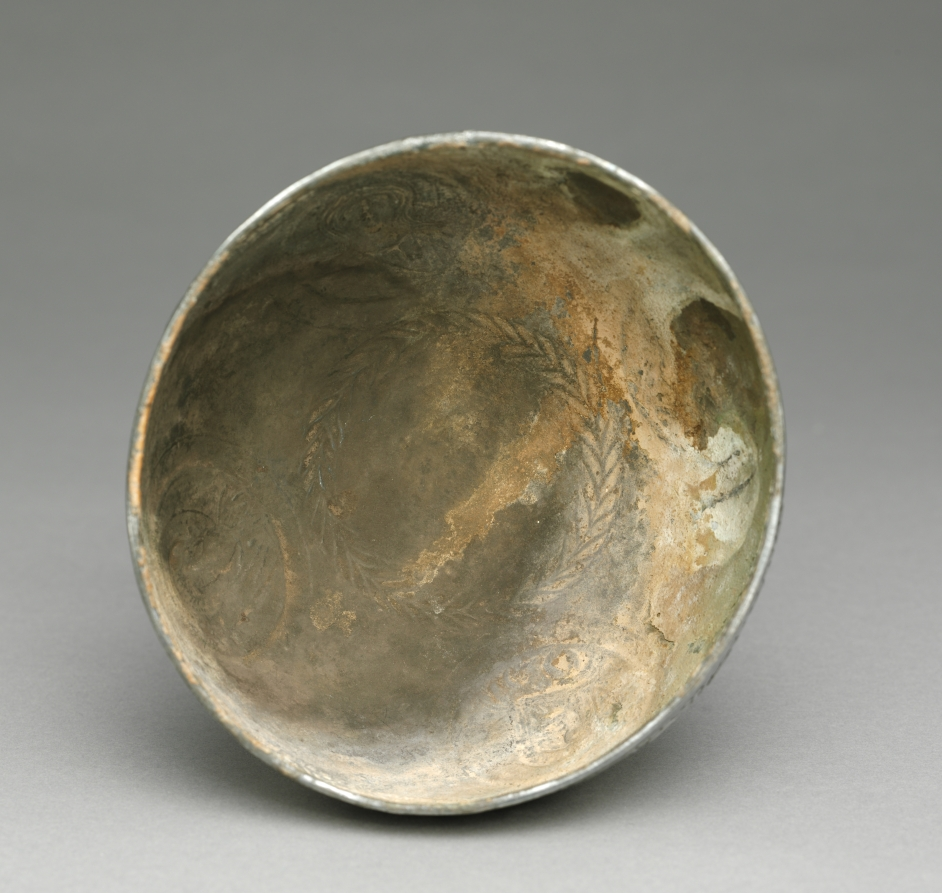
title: Chalice from the Beth Misona Treasure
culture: early Byzantium, Constantinople or Syria, Byzantine period, 6th-7th Century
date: c. 500–700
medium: silver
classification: Metalwork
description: These four liturgical silver vessels—a paten and three chalices (1950.378–81)—form what is now called the Beth Misona Treasure, named for the village in northern Syria for which the objects were made. While nothing is known about the exact location and circumstances of the treasure's discovery, the people of the village of Beth Misona were, like other Christian communities in Syria and Palestine, probably forced to bury their church silver to hide it from the Persians or Arabs, who conquered their lands in the first half of the 600s. The paten, which held pieces of Eucharistic bread used during Mass, is decorated with an engraved Latin cross surrounded by a dedicatory inscription that names the paten's donor—Domnos—and its original location, the church of Saint Sergios in Beth Misona. The chalices, which contained the Eucharistic wine used during Mass, feature broad cups decorated with portrait busts of Saints Peter and Paul, Christ, and the Virgin. One chalice bears a dedicatory inscription naming its donor—Kyriakos, Domnos's son—and the priest of the church that received the pious gift—Zeno.